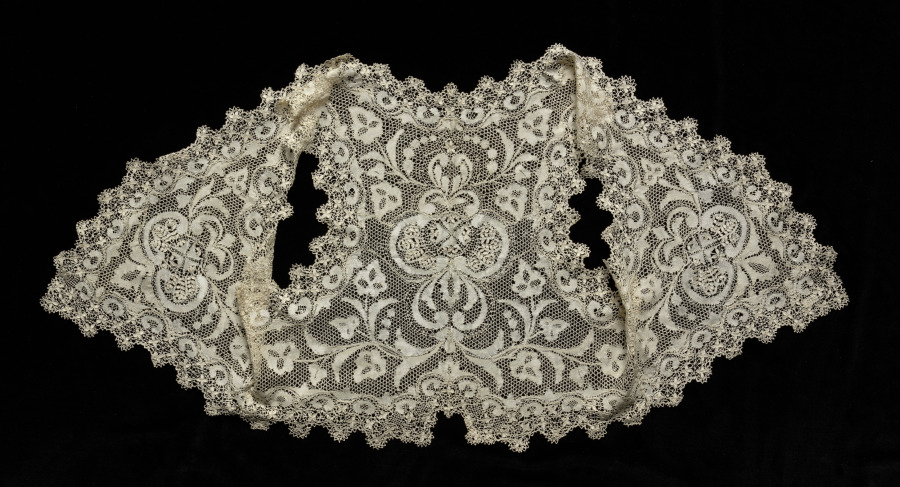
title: Bolero Style Lace Jacket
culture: Malta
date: 1800s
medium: Silk: bobbin lace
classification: Lace